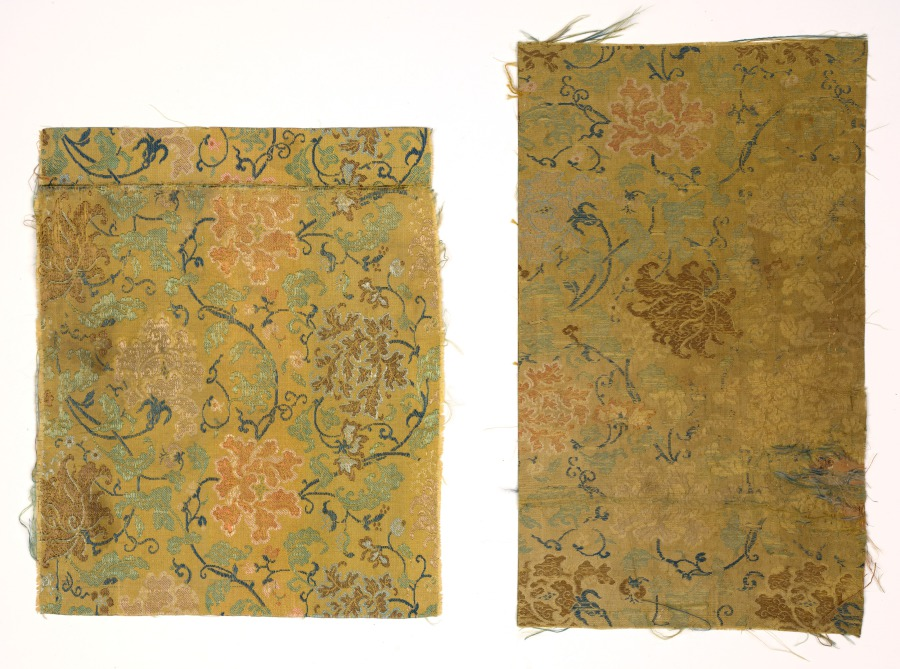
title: Fragments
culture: China, 18th century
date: 1700s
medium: twill ground; silk diasper weave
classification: Textile